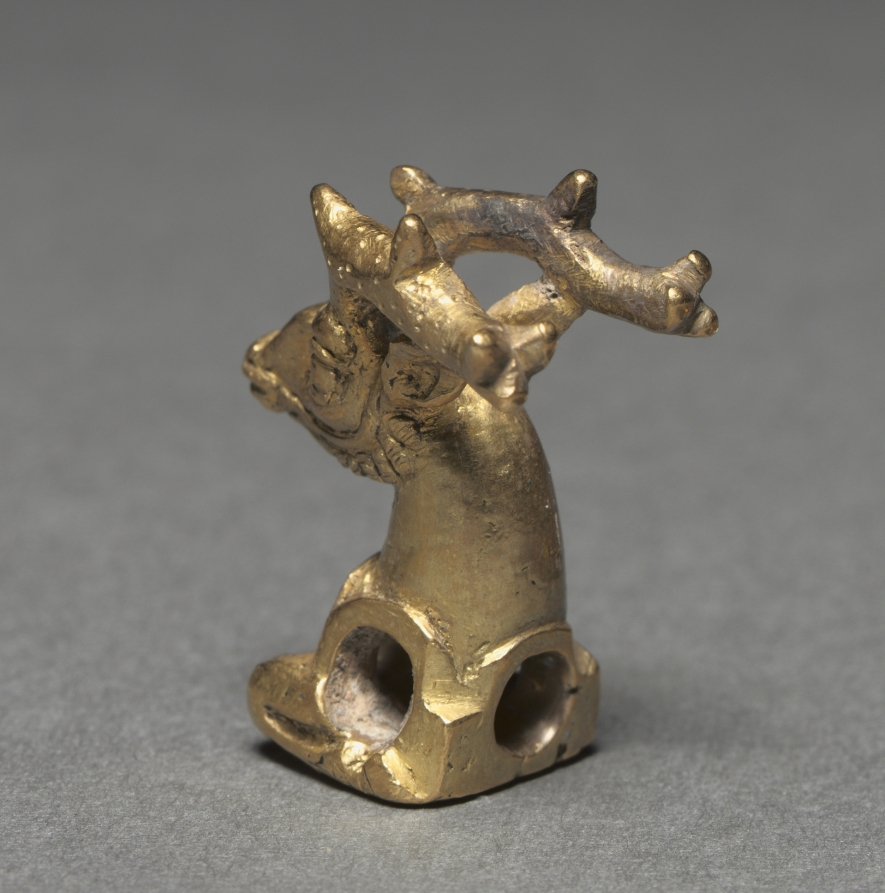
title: Stag Bridle Ornament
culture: Iran or Afghanistan, Sarmatian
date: 400–300 BCE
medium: gold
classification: Metalwork